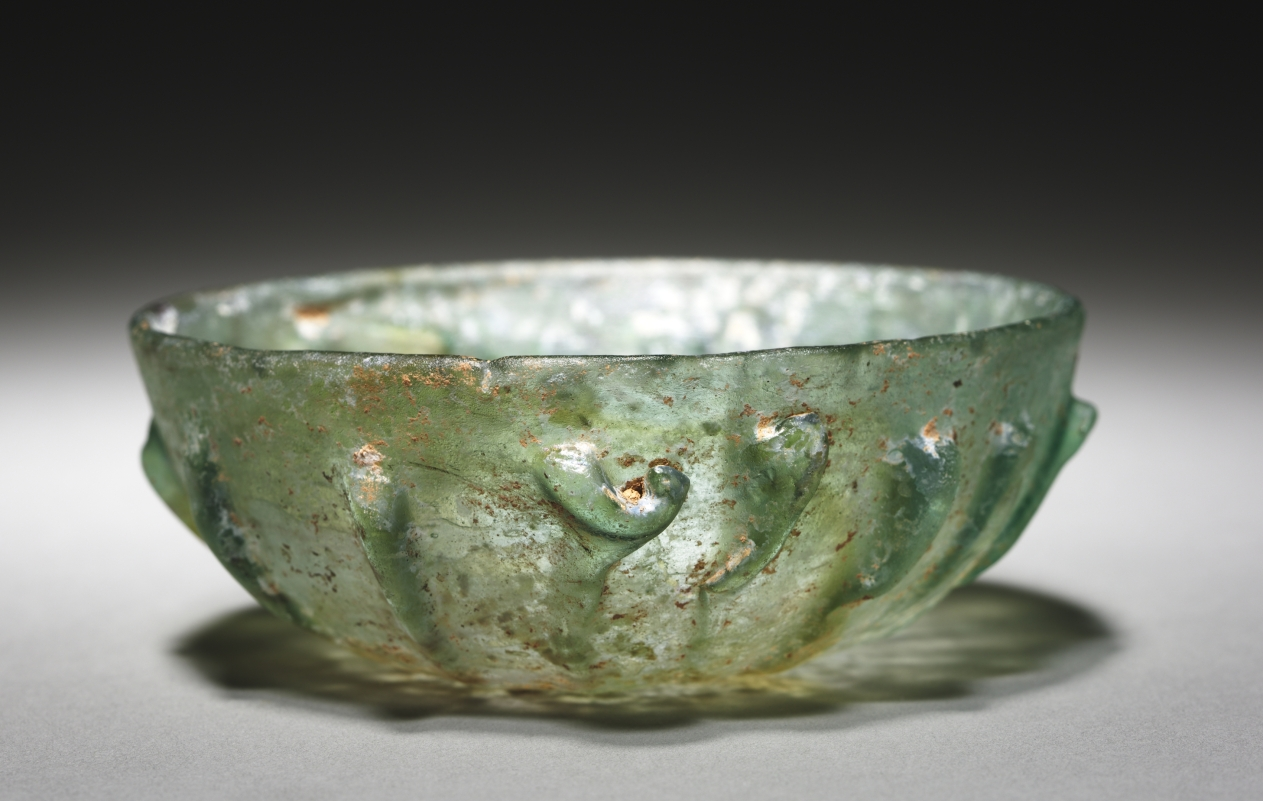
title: Shallow Ribbed Bowl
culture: Roman, Eastern Mediterranean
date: 50 BCE–100 CE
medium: glass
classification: Glass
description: Shallow ribbed glass bowls are a fairly common ancient glass vessel type, likely made by blowing or pressing molten glass into molds. After cooling, an artisan would rotate the bowl on a wheel or lathe, using a gentle abrasive to smooth out imperfections.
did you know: Although this bowl was probably mold-made, several of its unevenly formed ribs show pincer marks.